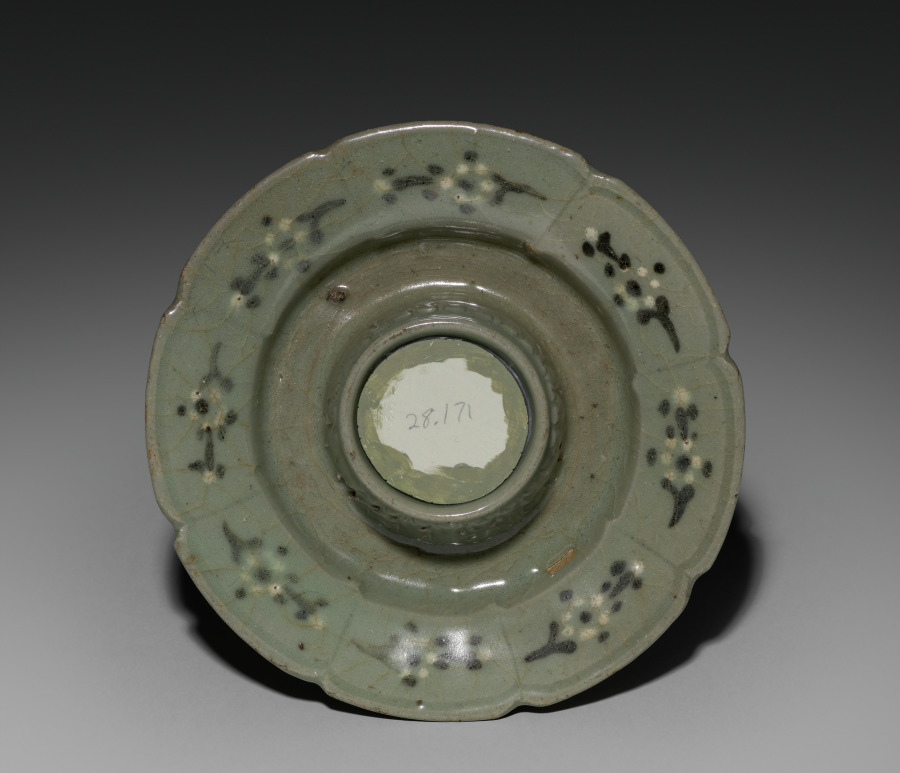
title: Saucer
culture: Korea, Goryeo dynasty (918–1392)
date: 1100s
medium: Celadon ware with inlaid white and black slip decoration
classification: Ceramic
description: This celadon wine cup is inlaid with a chrysanthemum pattern that reflects Koreans’ enjoyment of both the poem "Drinking Wine" and the blessings of longevity associated with the Double Nine Festival. The flower design on the saucer is less delicate than the cup, as the cup and saucer were originally from different sets; they were later paired together after each lost its mate.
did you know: Elites of the Goryeo period are known for their love of drinking tea and wine. This type of delicate-looking cup stand not only made their drinking experience more enjoyable, but also showed their refined taste.